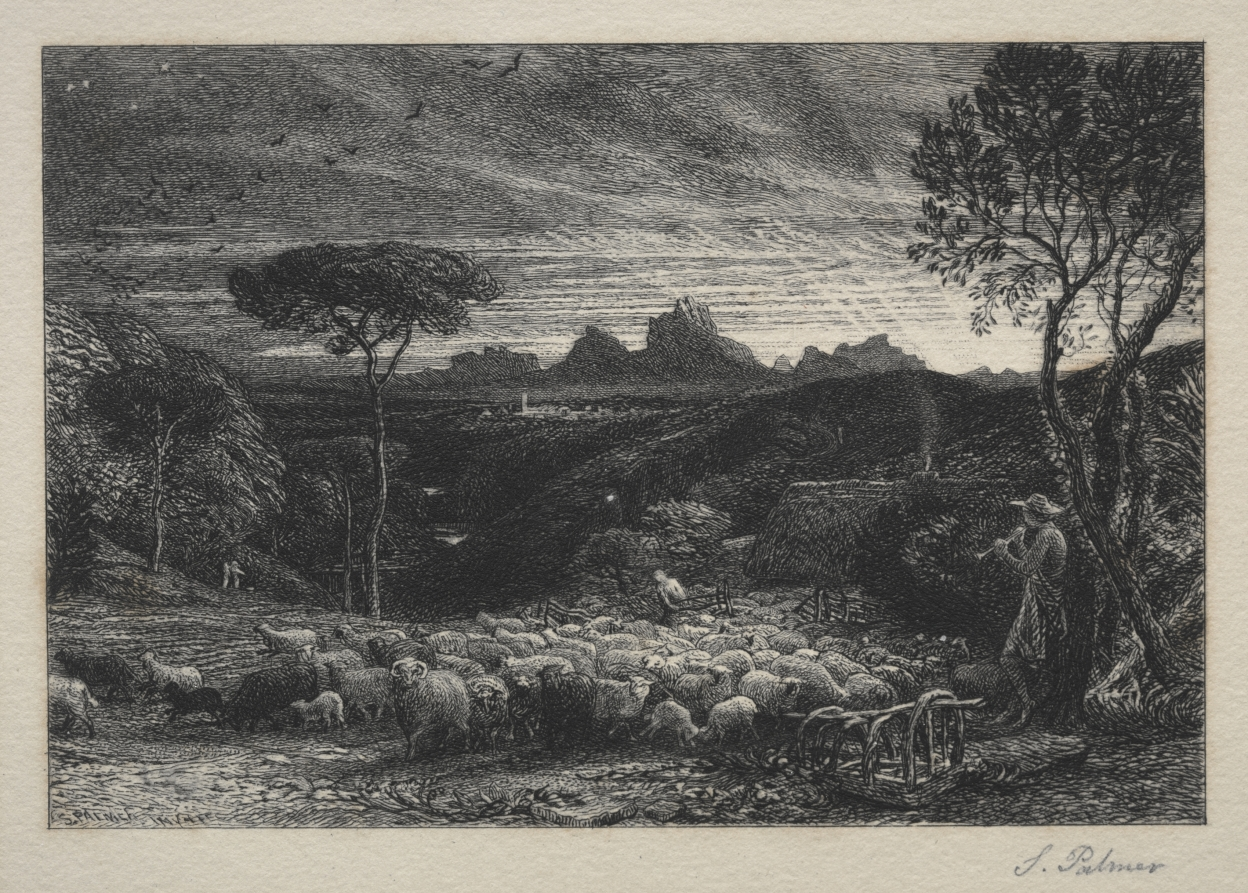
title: Opening the Fold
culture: England, 19th century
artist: Samuel Palmer (British, 1805–1881)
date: 1880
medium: etching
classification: Print